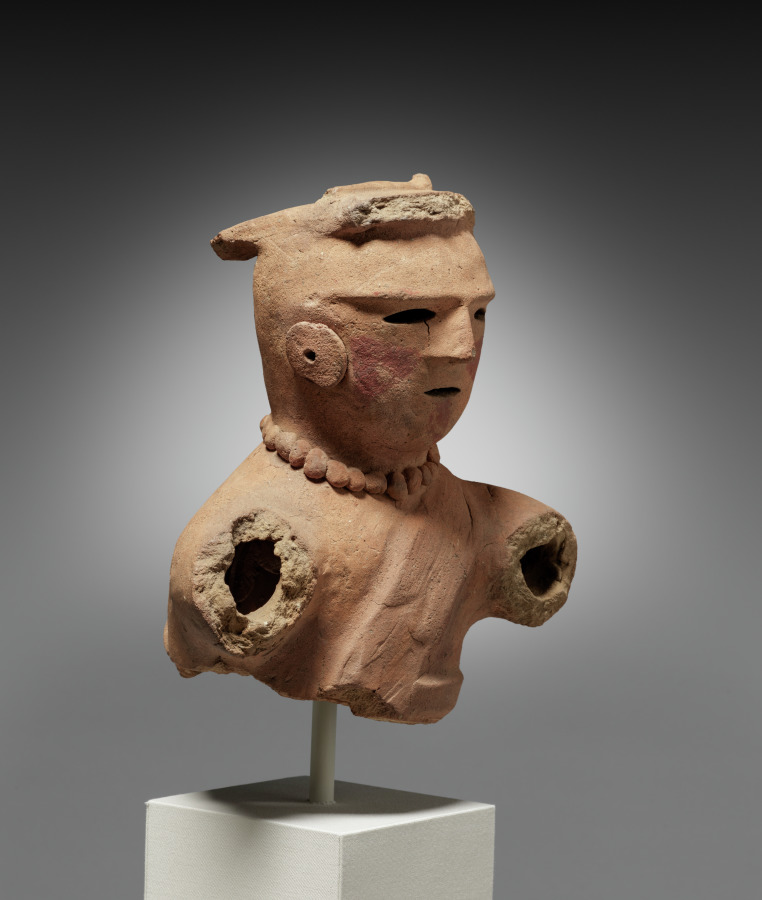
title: Haniwa Figure of a Female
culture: Japan, Kofun period (300–710 CE)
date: 500s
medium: earthenware with traces of pigment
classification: Sculpture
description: Figures in a variety of dress including military and ceremonial garb start to appear on Japanese earthen mounded tombs called old mounds (kofun) from the 400s to 500s CE. This fragment depicts a woman with red triangles on her face and wearing jewelry. Archaeologists speculate that the facial markings had a ritual or symbolic function, perhaps indicating she is a female shaman. Many figures of this kind have been found in digs in the Kanto region of eastern Japan. We can only guess at the meaning of the clay cylinders called haniwa.